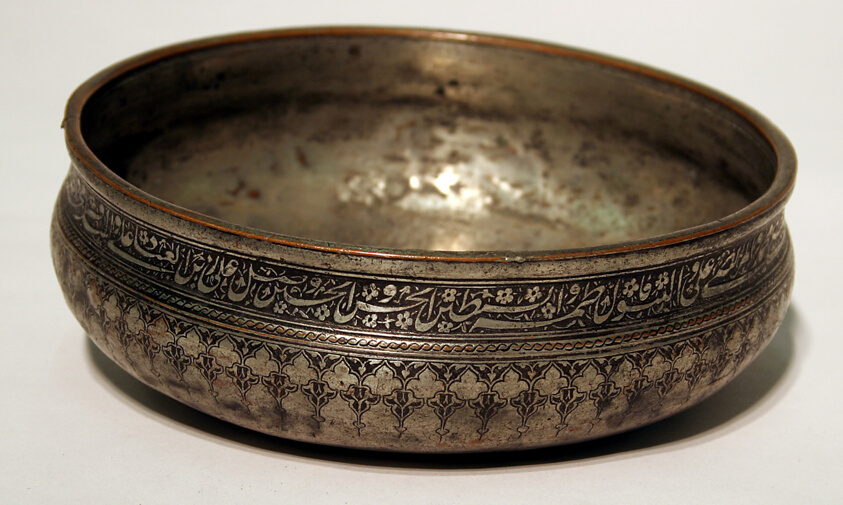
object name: Vessel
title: Shallow Bowl Inscribed with Blessing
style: isfahan, Islamic (culture or style)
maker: Iran; possibly Isfahan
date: 17th century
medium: Tin-plated copper with engraved decoration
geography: Iran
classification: bowl; metal; dish (vessel); vessel; asian art